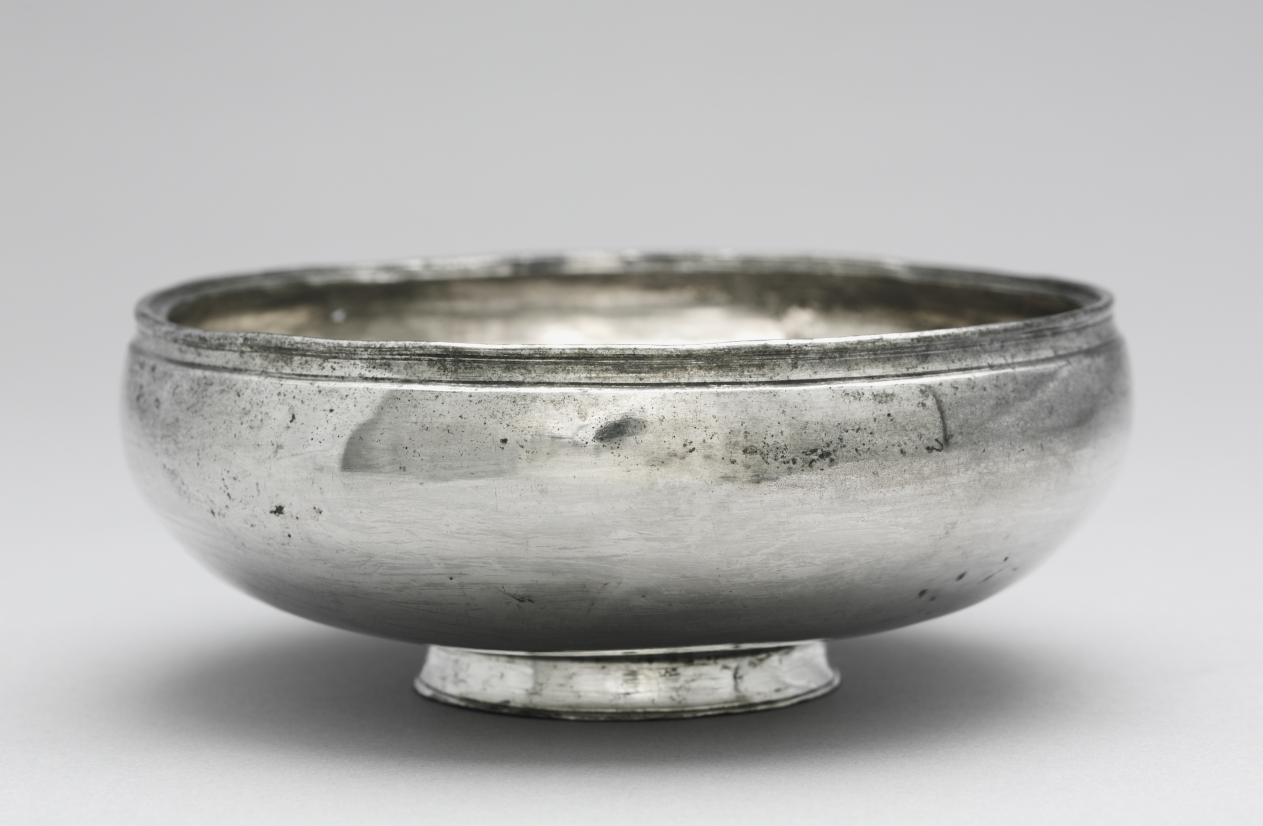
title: Bowl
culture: Byzantium, Syria(?), Byzantine period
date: 350–450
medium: silver with niello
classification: Metalwork